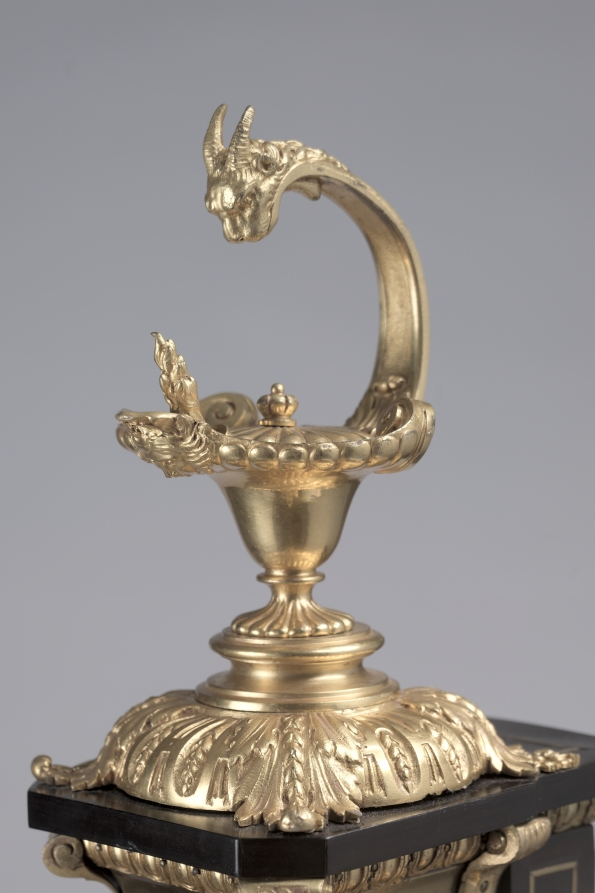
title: Clock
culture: France, late 17th Century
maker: André-Charles Boulle (French, 1642–1732)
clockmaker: Balthazar Martinot II (French, 1636–1714)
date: c. 1695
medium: tortoise shell and brass inlay, gilt bronze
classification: Furniture and woodwork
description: Appointed cabinetmaker to King Louis XIV in 1672, André-Charles Boulle became a master of furniture making in France during the late 1600s until his death in 1732. Known primarily for his use of marquetry, in which metal patterns are inlaid into tortoiseshell then applied within the veneered surface of the furniture, Boulle established a level of quality and craftsmanship few others could achieve. As a result, his work found favor at the royal court and among other aristocrats and diplomats eager to impress the king. Often exhibiting stout architectural proportions with elegant groups of inlaid motifs, Boulle’s designs are an example of the intellectual fashion for contrasting ideas, materials, and motifs. With its relatively new scientific invention of a pendulum mechanism and the addition of a barometer, the mantel clock represented the wealth, prestige, and intellect of its owner.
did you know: The Latin phrase inscribed on this clock, Dirigit atque movet, can be translated as "time constantly moves on."